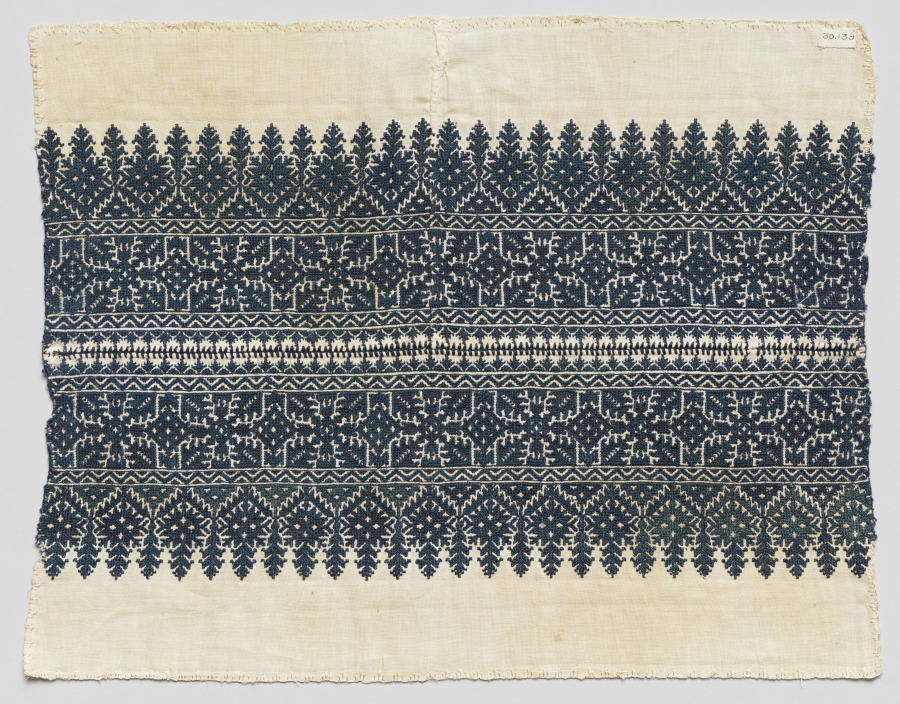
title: Fragment of a furnishing textile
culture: Africa, North Africa, Morocco, Fes, Moroccan embroiderer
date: early 1900s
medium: Cotton, silk, dye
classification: Embroidery